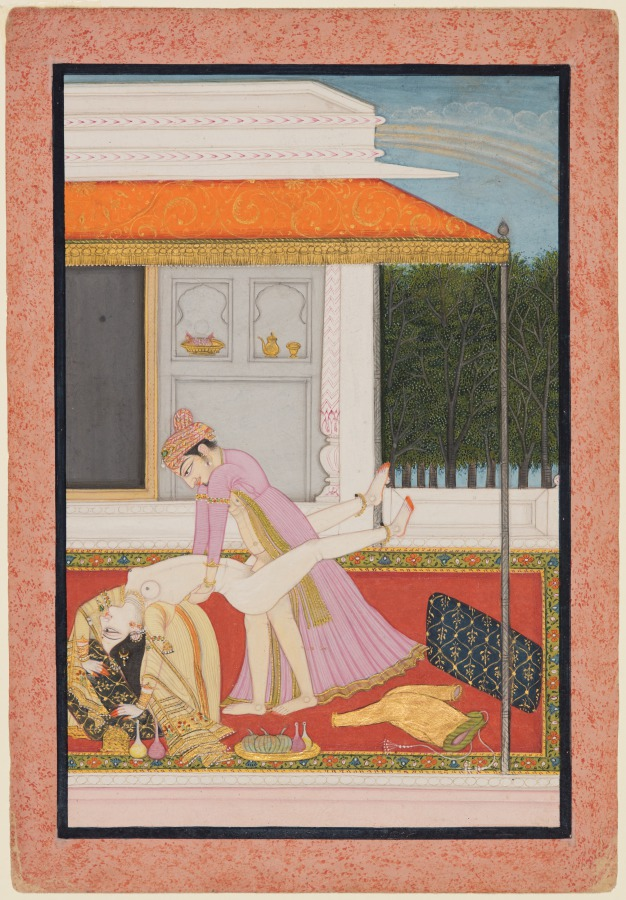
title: An amorous couple, probably Raja Mahendra Pal of Basohli with a favorite queen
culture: Northern India, Pahari kingdoms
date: c. 1810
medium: Gum tempera and gold on paper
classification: Painting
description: On a terrace outside a royal chamber, a couple dressed in noble garments are making love. The man has loosened his jama in passion while his consort’s gold blouse has been thrown on the red carpet. Thin clouds appear to gather above the golden rays of the evening sun in the clear sky.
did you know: Bottles of wine, fruits, and a box of betel leaves are in the foreground.